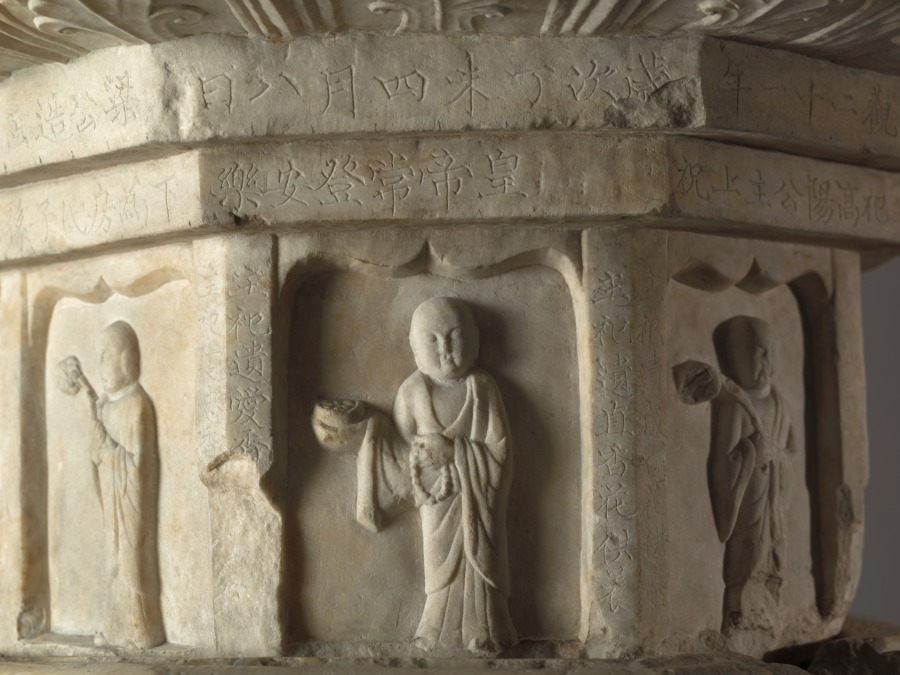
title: Fang Xuanling Pedestal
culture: China, Tang dynasty (618-907)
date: 647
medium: marble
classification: Sculpture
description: This double lotus pedestal exhibits the rich, ornate style of early Tang sculpture. It was commissioned by the Duke of Liang, Fang Xuanling (578–648), for the blessing of his second son and daughter-in-law, the Tang imperial princess of Gaoyang. The iconography and inscription suggest that it originally went with a statue, now missing, of Shakyamuni, the historical Buddha, instead of Amitayus. Today the pedestal is topped with Amitayus, the Buddha of Infinite Life, seated in meditation. Although the pedestal was not made with the statue, the combination is faithful to the original artistic conception.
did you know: In front, the top layer of the pedestal has an abstract curvilinear motif suggesting drapery; the rear is carved with a flower-and-leaf motif.